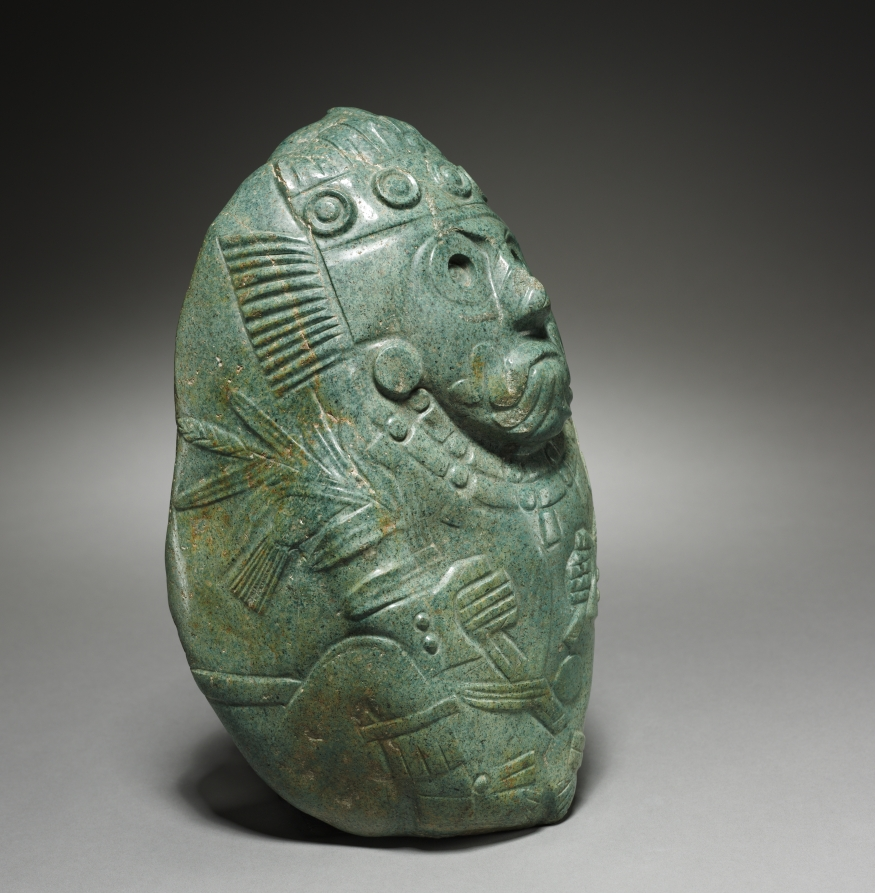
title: Tlaloc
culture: Central Mexico, Aztec, 13th-16th century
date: c. 1200–1519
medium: stone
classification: Sculpture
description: A natural cobble of greenstone has been smoothed and carved in low relief to portray the Aztec rain god Tlaloc, recognizable by his ringed eyes, twisted nose element, and fanged mouth. As the provider of water, Tlaloc is a patron of agriculture and holds a stalk of maize in one hand. To the Aztecs, Tlaloc was an ancient and civilized god; his worship could be traced back to the ancient ruined site Teotihuacan.